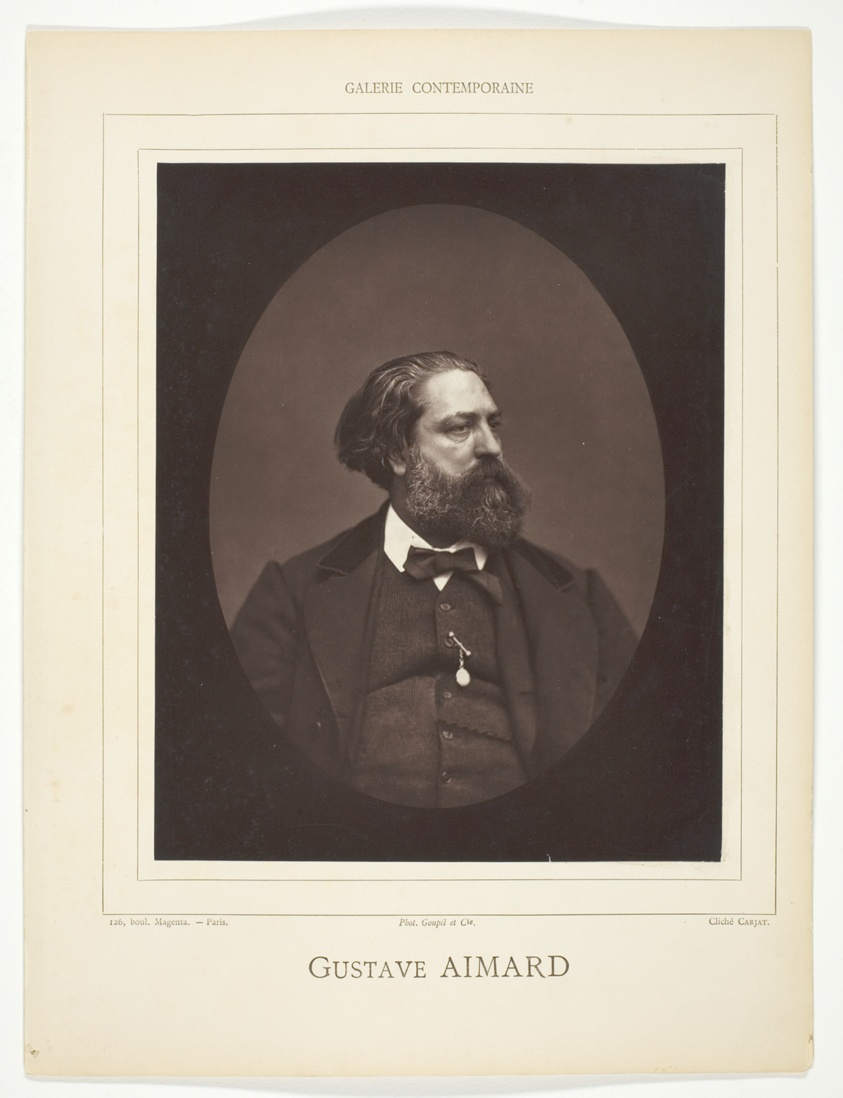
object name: Photograph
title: Gustave Aimard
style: 19th century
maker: Etienne Carjat (French, 1828–1906)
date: c. 1876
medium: Woodburytype, from the periodical “Galerie Contemporaine Littéraire, Artistique” (1879), volume 7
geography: France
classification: woodburytype; photomechanical process; photography; photograph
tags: Collected by Hugh Edwards, portraits, portraits: male subject, photography, Contemporaine Littéraire